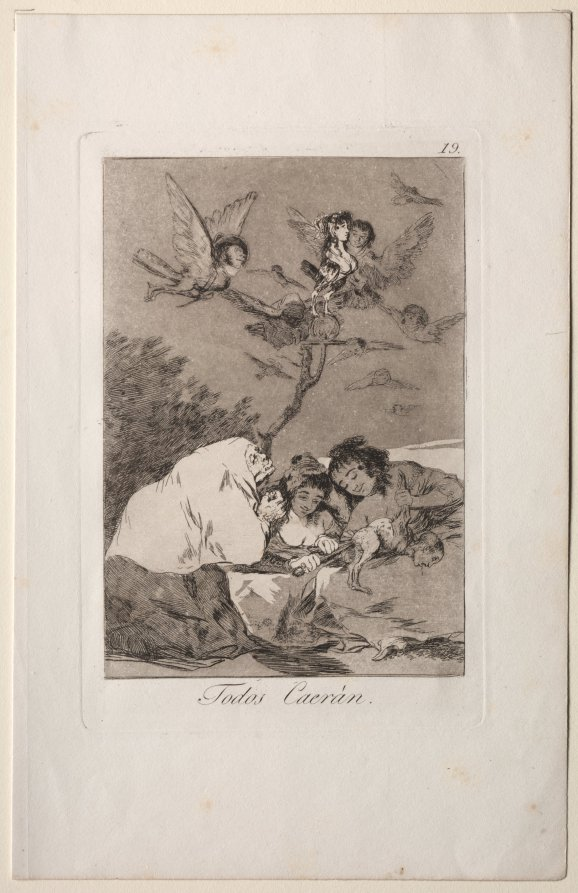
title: All Will Fall, Plate 19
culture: Spain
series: Los Caprichos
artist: Francisco de Goya (Spanish, 1746–1828)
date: 1799 (printed c. 1855)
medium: etching and aquatint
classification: Print